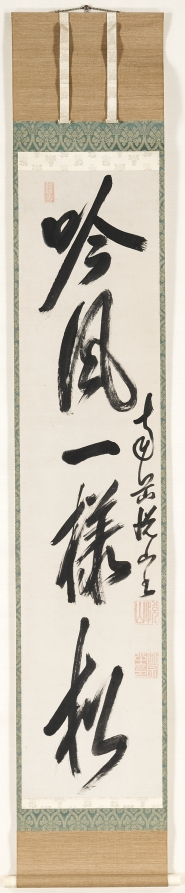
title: Calligraphy in Semi-Cursive Style (xing-caoshu)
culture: China, Qing dynasty (1644-1911)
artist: Yueshan Daozong (Chinese, 1629–1709)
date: c. 1660–1709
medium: hanging scroll; ink on paper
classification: Calligraphy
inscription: 吟風一樣松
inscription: 悅山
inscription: 道宗之印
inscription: Linji zheng zong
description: This bold calligraphy written by Yueshan, an Ōbaku school monk, consists of five characters tentatively translated as “Pine trees singing in the wind.” The line is from Cold Mountain Poems (Hanshan shi). Cold Mountain is the pen name (hao) of the poet monk Han Shan, as well as the name of a place. In one poem Han describes getting lost on the road to Cold Mountain, perhaps an allusion to the search for religious enlightenment.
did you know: The Ōbaku school of Chan (Zen in Japanese) Buddhism was founded in Japan by Chinese monks in the 1600s. The monk Yueshan emigrated from the Chinese province of Fujian to serve as priest and later abbot at Manpukuji, the headquarters of the Ōbaku school in Japan.